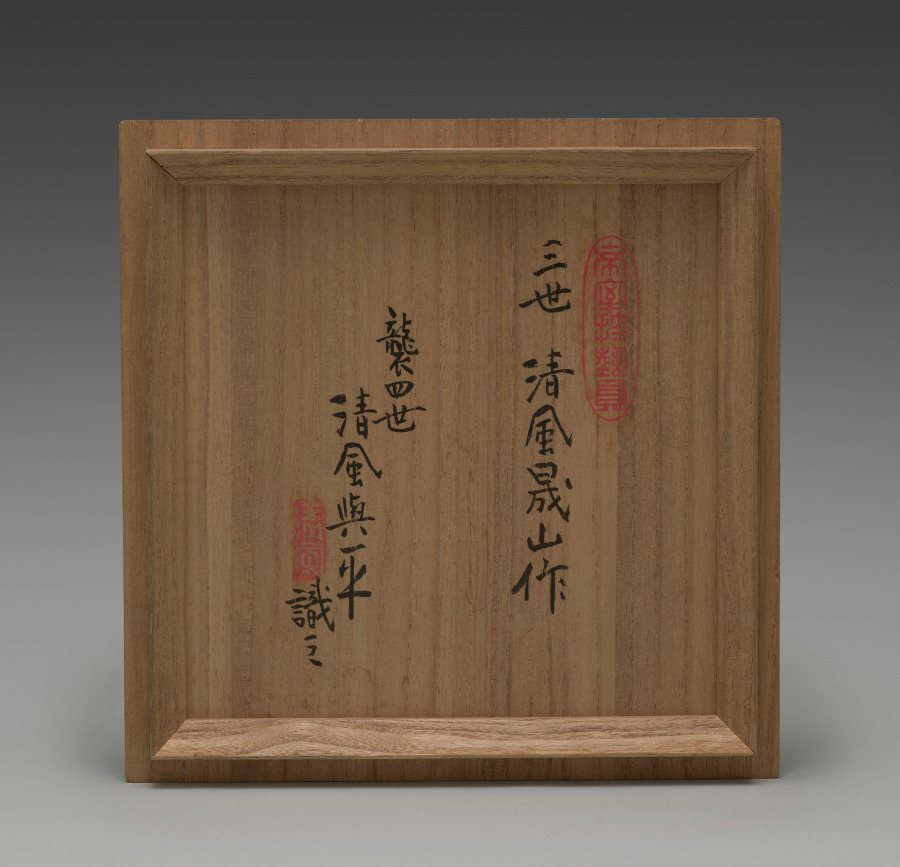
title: Water Container with Peonies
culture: Japan, Meiji period (1868–1912)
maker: Seifū Yohei III (Japanese, 1851–1914)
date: 1900–1914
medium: Porcelain with molded and carved design, green glaze, and black lacquered lid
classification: Ceramic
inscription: 清風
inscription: 帝室技芸員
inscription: 清風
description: This ceramic is an especially accomplished example of Yohei III’s combination of an allover translucent colored glaze with molded and carved designs. It features the peony as its primary motif. The water container, or mizusashi, has a green glaze, and its design takes into consideration the rounded shape and the seated position of the host and guests. It begins low on the body with a flower just beginning to open and continues with another flower a bit higher up, with its petals fully extended and beginning to open outward. It finishes with a flower in full bloom, petals and leaves unfurled and spread outward from the center, now occupying almost the entire surface. The water container once belonged to the Hosokawa family, whose go-between corresponded with Yohei IV about the piece. Yohei IV thanked them for their payment and requested that despite his father’s death in the previous year, they continue to favor the studio with their orders. The letter and its envelope, as well as an auction tag, remain with the object.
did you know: This water container may also serve as a site for cultural reckoning, as when the life cycle of a flower prized in East Asia as a symbol of wealth is displayed across a Japanese chanoyu vessel whose glaze is associated with the seats of power in China and Korea.